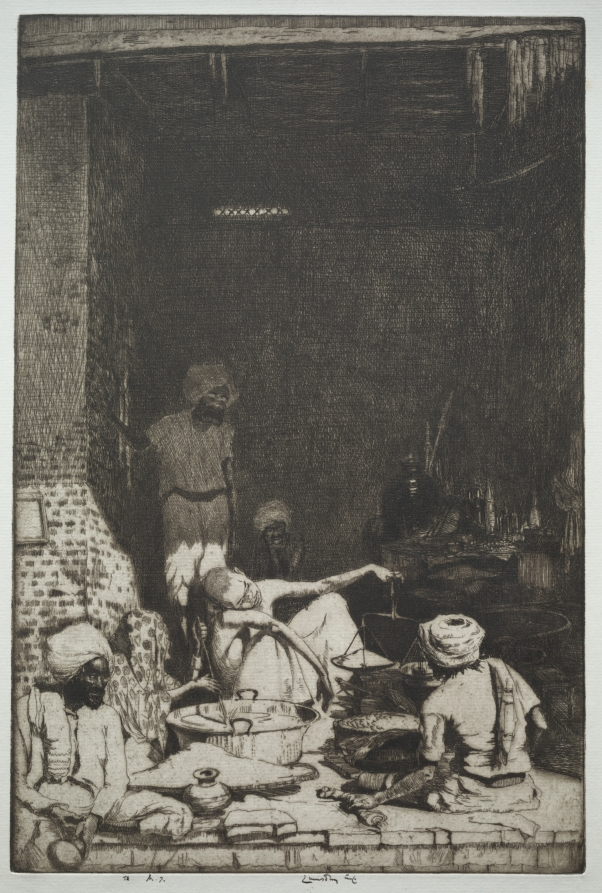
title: The Scales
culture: England, 20th century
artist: Ernest Stephen Lumsden (British, 1883–1948)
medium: etching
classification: Print